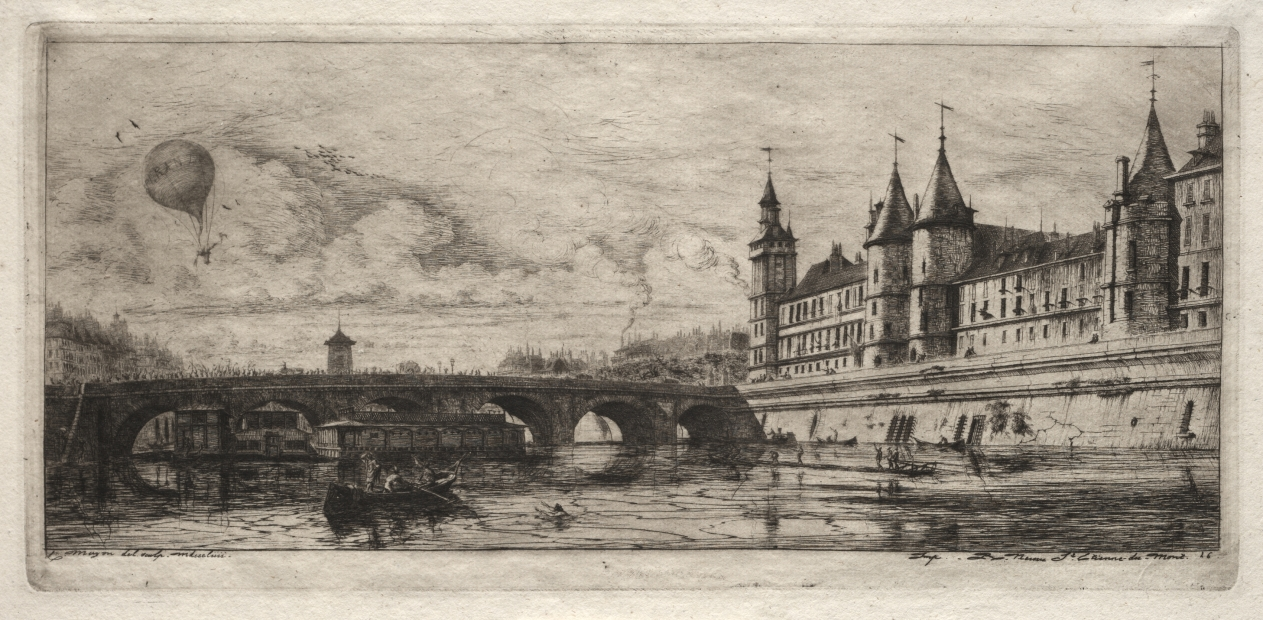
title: Etchings of Paris: The Exchange Bridge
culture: France, 19th century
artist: Charles Meryon (French, 1821–1868)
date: 1854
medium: etching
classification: Print